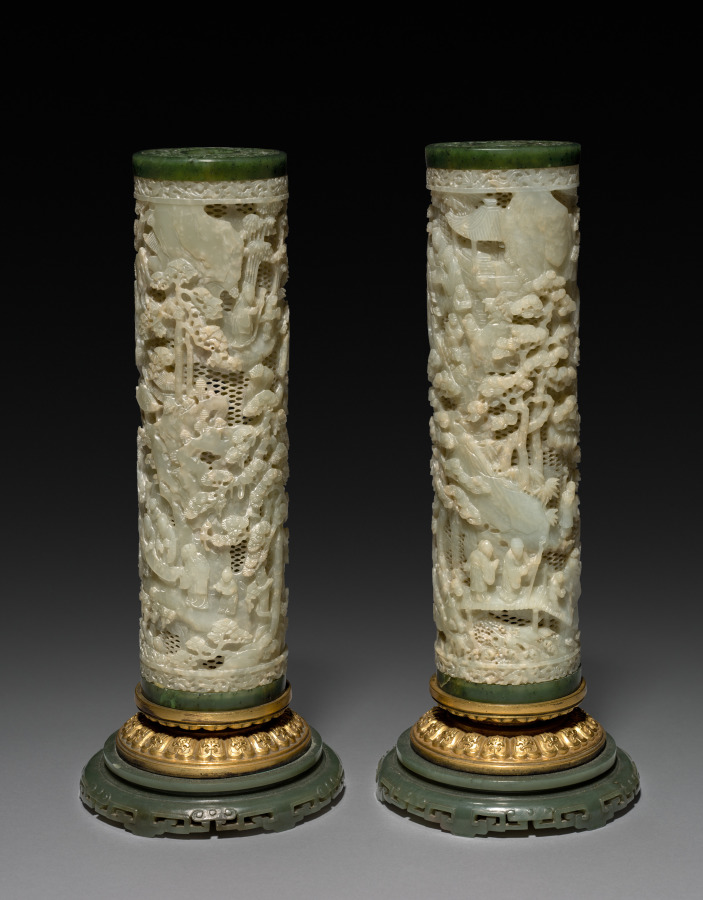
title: Pair of Cylinders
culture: China, Qing dynasty (1644-1911) or Republican period (1912-49)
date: 1800–1940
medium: jade; carved jade and gilt bronze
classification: Jade